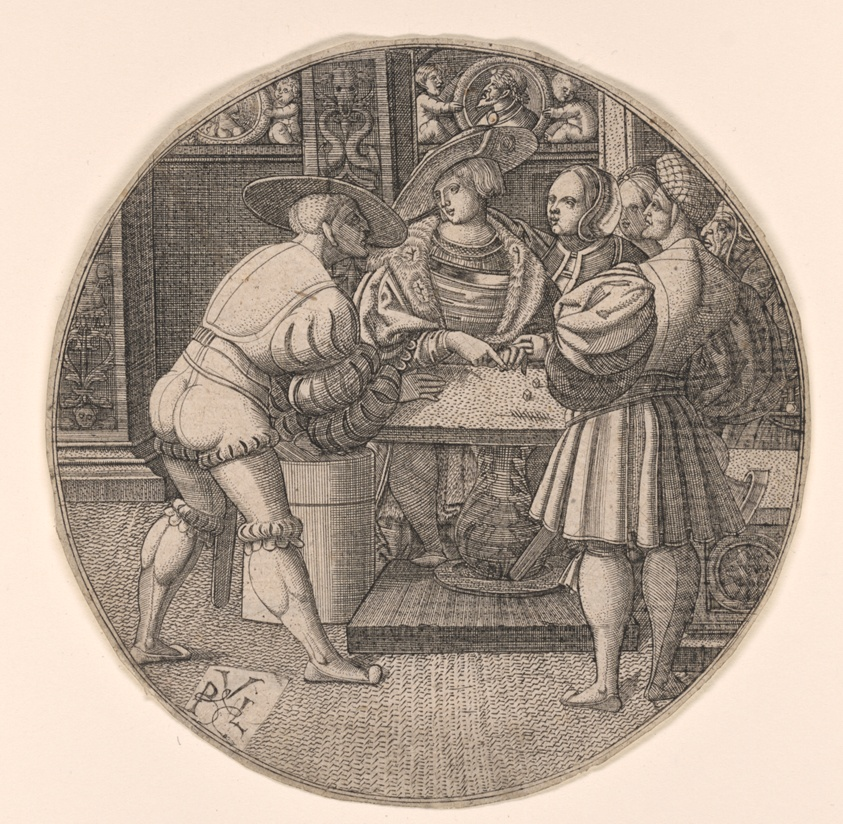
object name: Print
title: Men Playing a Game of Dice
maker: Master PVL; Dutch, active early 16th century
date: c. 1520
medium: Engraving on paper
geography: Netherlands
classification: engraving; paper; print; prints and drawing